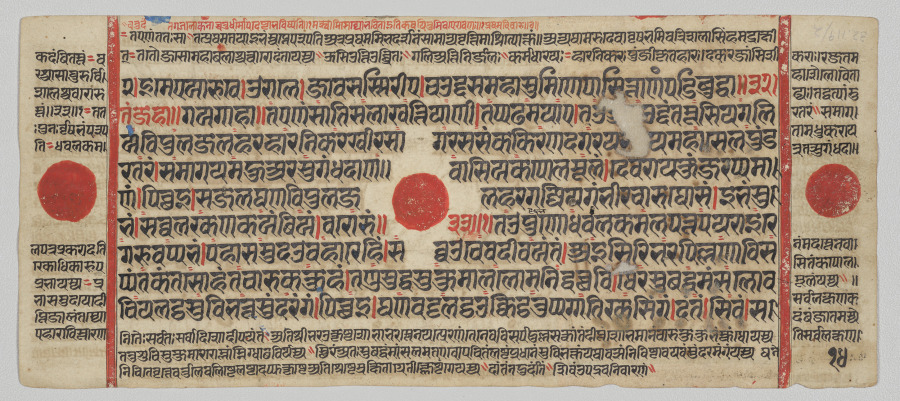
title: Text, Folio 14 (verso), from a Kalpa-sutra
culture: Western India, Gujarat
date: c. 1475–1500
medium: Gum tempera, ink, and gold on paper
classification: Painting